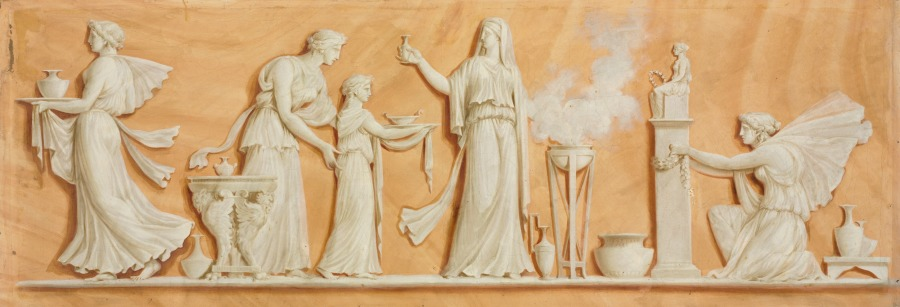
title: Overdoor Painting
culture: France, 18th century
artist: Pierre Rousseau (French, 1751–1829)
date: 1790s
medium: oil on canvas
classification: Painting